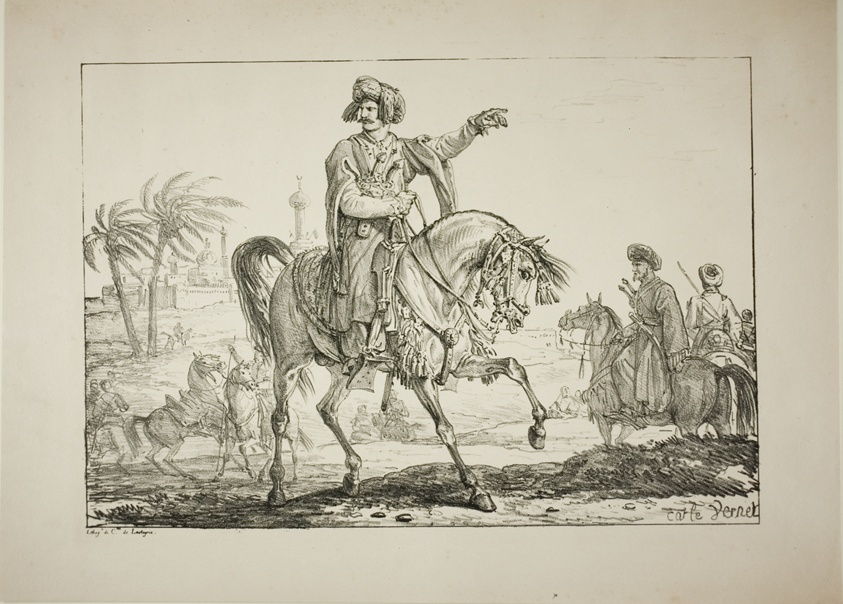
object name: Print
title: Chief Mameluk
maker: Carle Vernet (French, 1758-1836); printed by Comte Charles Philibert de Lasteyrie (French, 1759-1849)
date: c. 1817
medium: Lithograph in black on buff wove paper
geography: France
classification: lithograph; print; prints and drawing